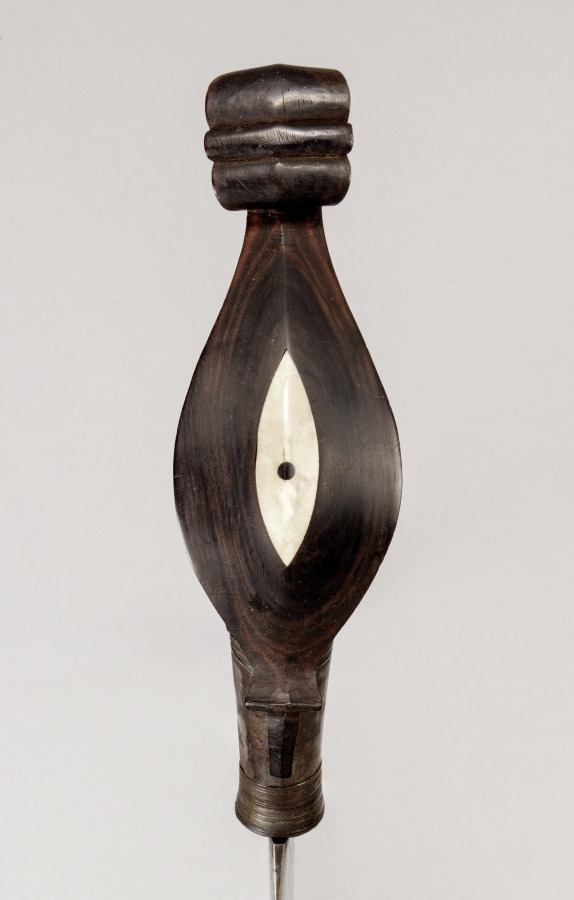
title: Sword (Barong)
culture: Philippines, Sulu or Basilan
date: before 1916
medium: Blade: metal inlaid with brass; handle: metal with silver foil, braided wire, and repoussé work; pommel: kamagong hardwood with bone inlay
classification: Arms and Armor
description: This sword’s hilt is carved from a dense Philippine hardwood known as kamagong and takes the form of a stylized cockatoo (kakatua), a motif characteristic of Tausug and Yakan sword hilts. Its broad, leaf-shaped steel blade is single-edged at the base and double-edged near the tip, making it ideal for thrusting in both warfare and ceremony.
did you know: The cockatoo-shaped pommel symbolizes vigilance and status among the Moro people of the southern Philippines.